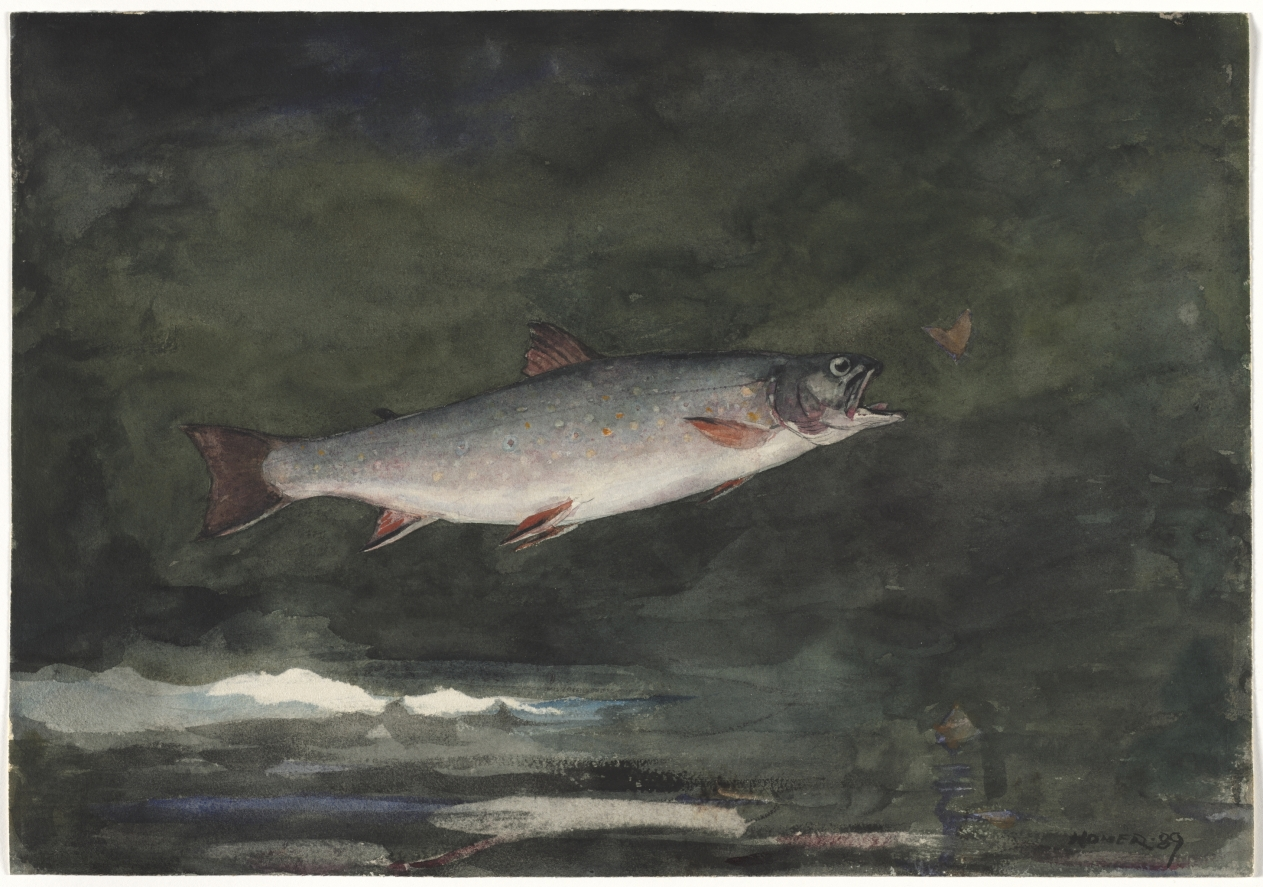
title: Leaping Trout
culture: America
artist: Winslow Homer (American, 1836–1910)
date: 1889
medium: watercolor over graphite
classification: Drawing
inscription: signed, lower right, in black watercolor: Homer '89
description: In 1886, Winslow Homer began to produce oil paintings and watercolors of subjects in the Adirondack Mountains, where he and his brother Charles had fished and hunted since the 1870s. In Leaping Trout, a silvery trout propels itself from the water in pursuit of a hapless insect or a fisherman’s fly. Homer’s choice to adopt the fish’s perspective, rather than a fisherman’s, is quite unconventional and heightens the drama and immediacy of the scene. His technique, influenced by the free brushwork of French Impressionism, similarly animates his still-life subject. Luminous washes of transparent blue and grey watercolor suggest the fish’s iridescent skin, while opaque pricks of bright red on its body lend a decorative effect reminiscent of Japanese prints. On the water’s surface, Homer uses scraping to create two brilliant white highlights, and dry brushing to produce the impression of a reflective surface. Although the overall effect is mysterious and dreamlike, the color and movement of the fish is carefully studied, suggesting Homer’s desire to appeal to the sportsmen who might buy his works.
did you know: Noted for his technical variety in watercolors, Homer used a technique called scraping—removing softened paint and paper fibers by taking a blunt or sharp object to the paper’s wet surface—to produce the pond’s two glistening white highlights.